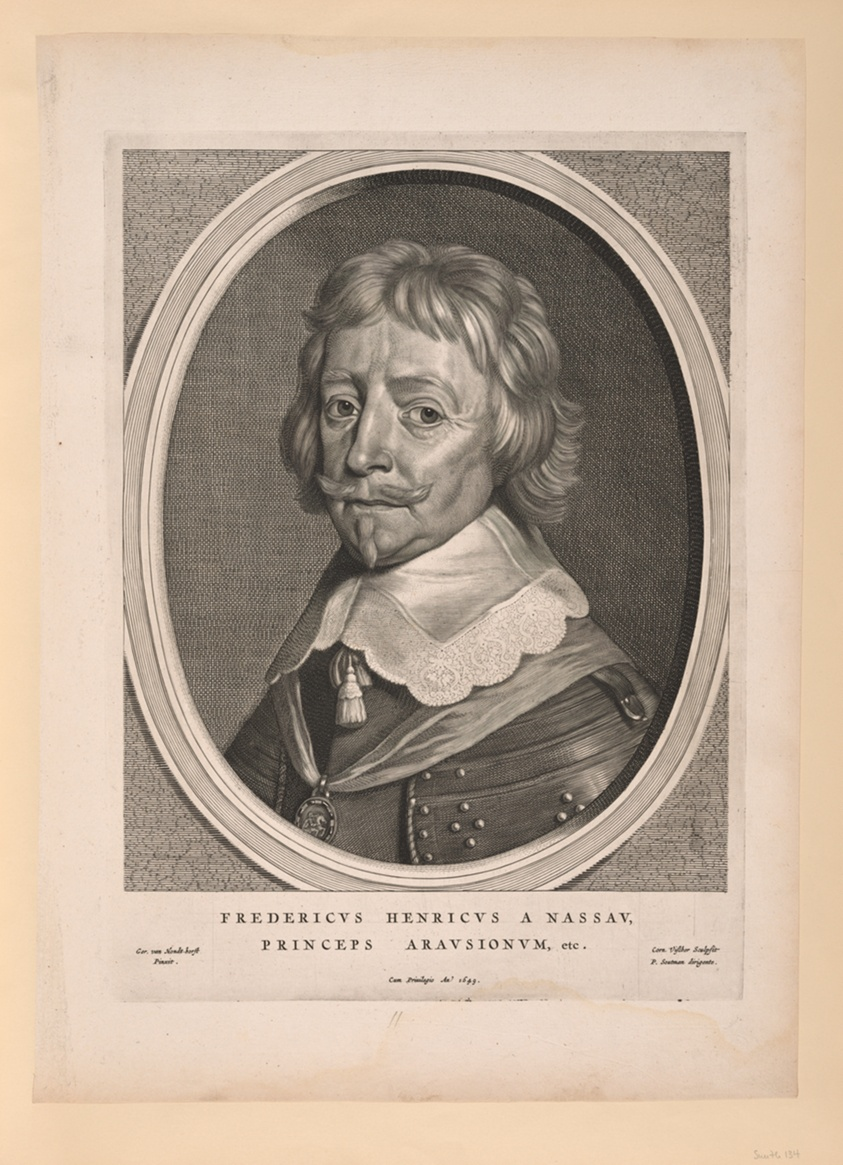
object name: Print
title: Frederick Henry, Prince of Orange, from Nine Portraits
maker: Cornelis Visscher (Dutch, c. 1629-1658); after Gerrit van Honthorst (Dutch, 1592-1656)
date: 1649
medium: Engraving on paper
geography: Netherlands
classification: engraving; paper; print; prints and drawing